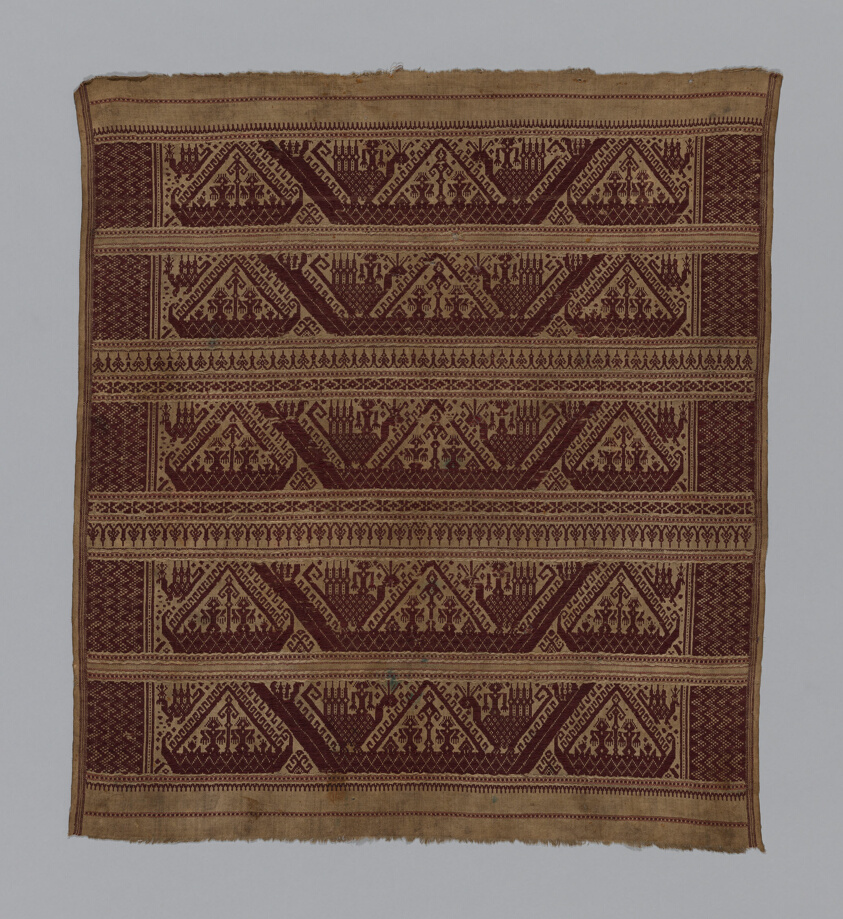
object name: Textile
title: Tampan (Ceremonial Cloth)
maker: Indonesia, South Sumatra, Pasisir or coastal area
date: 19th century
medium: Cotton and gilt-animal-substrate-wrapped hemp, plain weave with supplementary patterning wefts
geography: Indonesia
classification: textile; weaving; costume